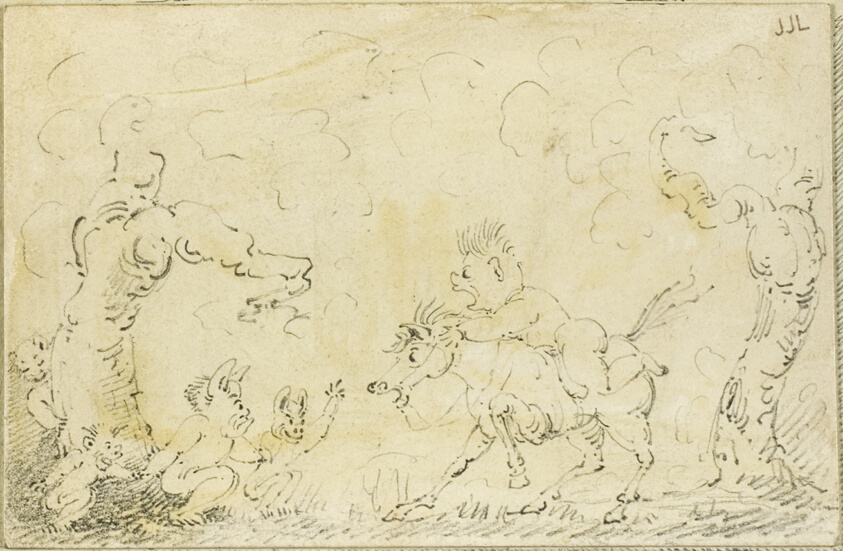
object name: Drawing and Watercolor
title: Comic Scene II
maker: George Cruikshank (English, 1792-1878)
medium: Pen and ink on paper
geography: England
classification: pen and ink drawings; drawings (visual works); prints and drawing